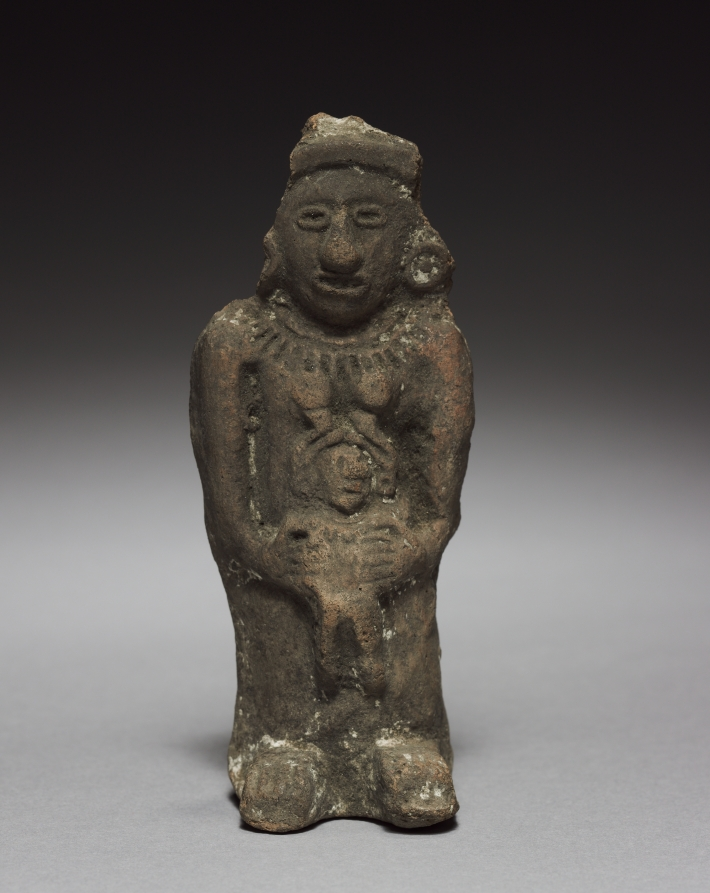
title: Figurine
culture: Mexico, Aztec, 14th century-16th century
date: 1325–1521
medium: terracotta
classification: Ceramic